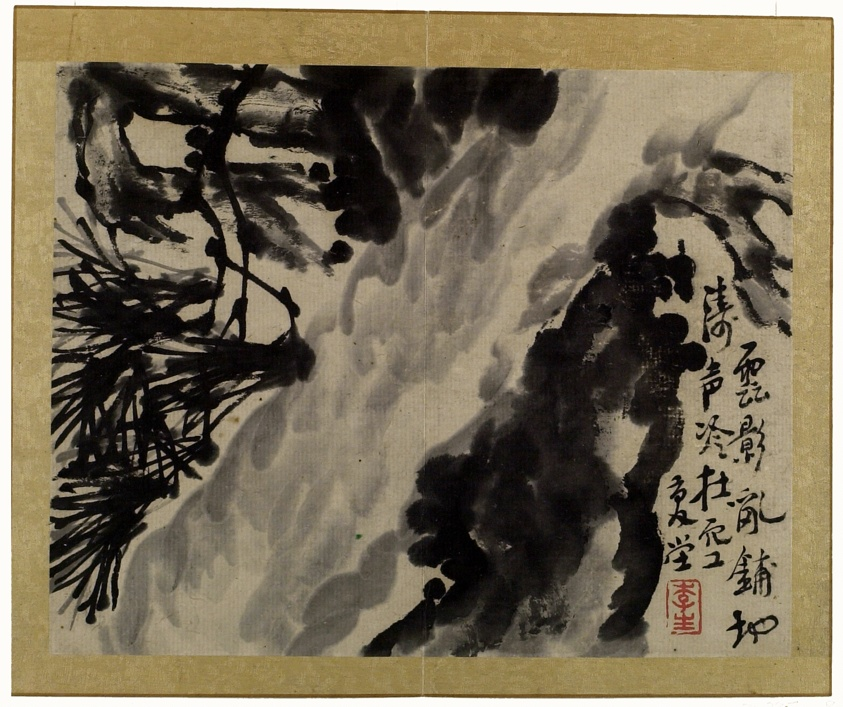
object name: Painting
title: Birds, Flowers and Insects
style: Chinese (culture or style)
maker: Li Shan (Attributed to); Chinese, 1686-after 1760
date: Qing dynasty (1644–1911), 18th century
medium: Album of eight leaves; ink and color on paper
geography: China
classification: album leaf; painting; asian art